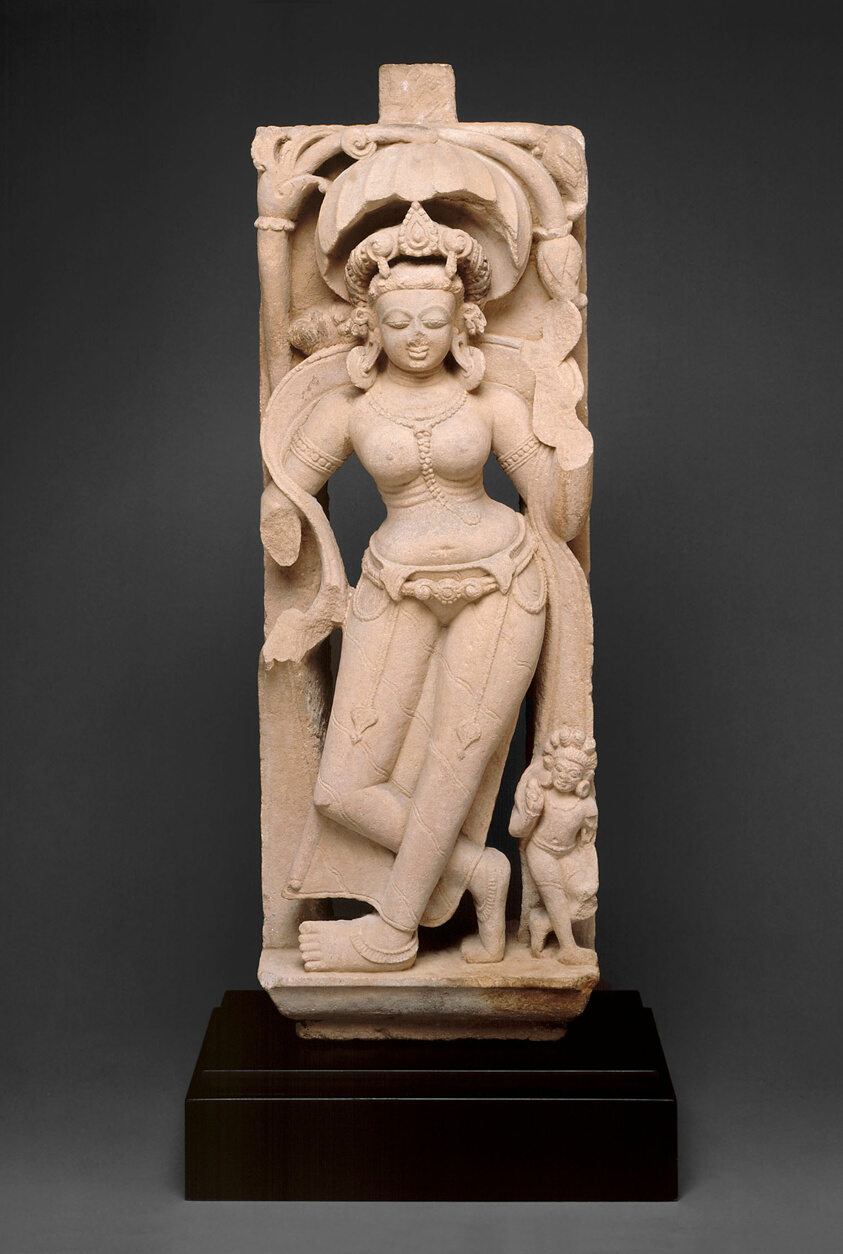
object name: Sculpture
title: Celestial Beauty (Apsara)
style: South Asian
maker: India; Rajasthan, Osian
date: 8th century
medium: Sandstone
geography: Rajasthan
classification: sandstone; stone; sculpture; asian art